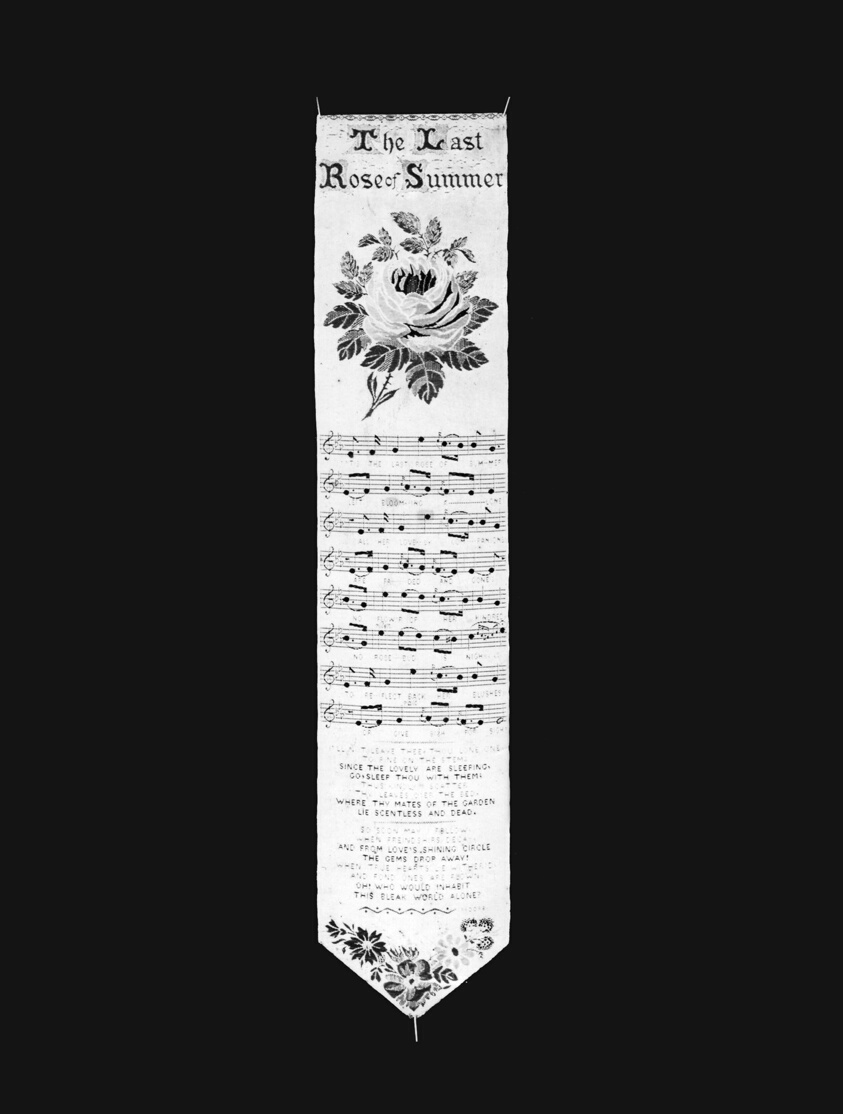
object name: Textile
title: Bookmark "The Last Rose of Summer"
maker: Woven by Thomas Stevens (English, 1828-88); Coventry, England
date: 1871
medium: Silk, plain cloth, brocaded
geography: Coventry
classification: textile; weaving